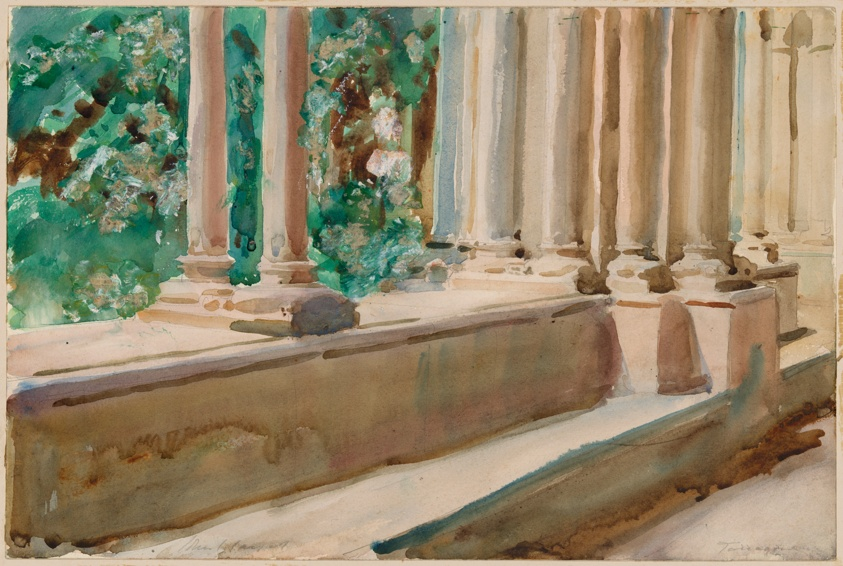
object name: Drawing and Watercolor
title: Tarragona Terrace and Garden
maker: John Singer Sargent (American, 1856-1925)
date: c. 1908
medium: Watercolor and opaque watercolor with printed paper fragments over traces of graphite on ivory wove paper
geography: United States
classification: watercolor; drawings (visual works); prints and drawing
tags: gardens